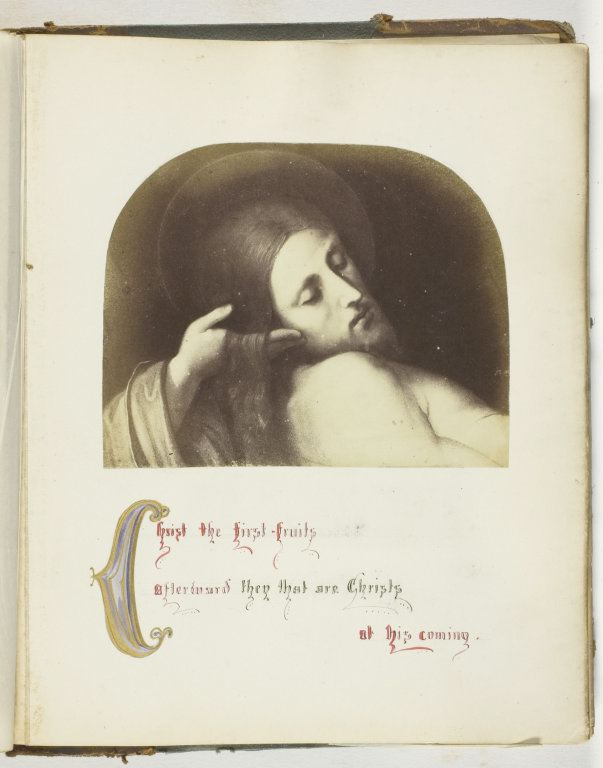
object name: Photograph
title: Untitled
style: 19th century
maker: Georgina Cowper, attributed; English, mid 19th century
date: 1855/68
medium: Albumen print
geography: England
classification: photograph; albumen silver print; photography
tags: Collected by Hugh Edwards, Untitled Album 1849-60, Auld Lang Syne